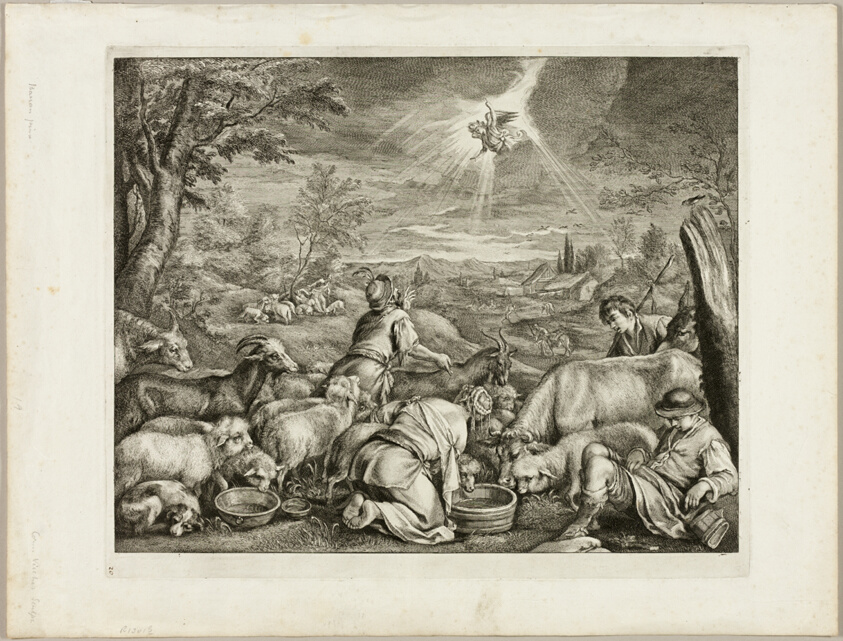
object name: Print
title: The Calling of Abraham (or The Annunciation to the Shepherds), from Cainet Reynst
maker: Cornelis Visscher (Dutch, c. 1629-1658); after Jacopo Bassano (Italian, 1510-1592)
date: c. 1655-58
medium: Etching and engraving on laid paper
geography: Holland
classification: engraving; print; prints and drawing